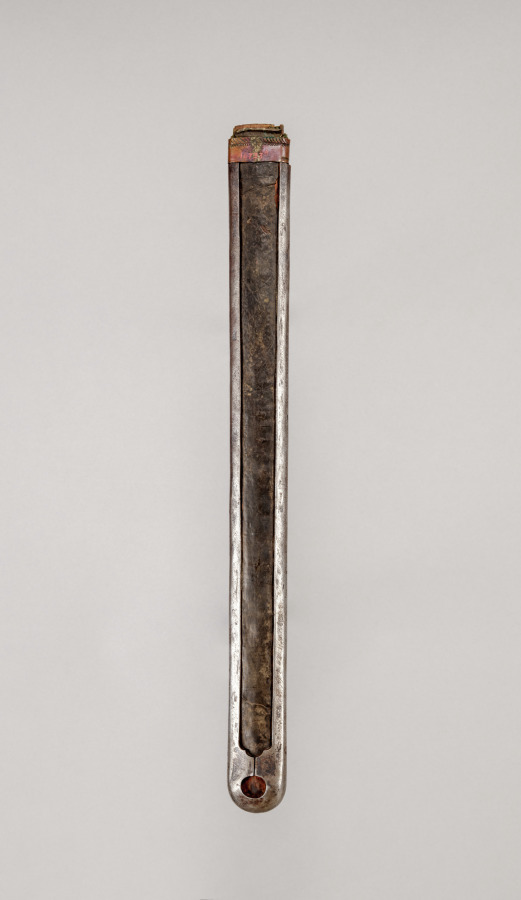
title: Scabbard for Sword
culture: India, Bhutan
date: 1800s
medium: iron with gilt and leather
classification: Arms and Armor